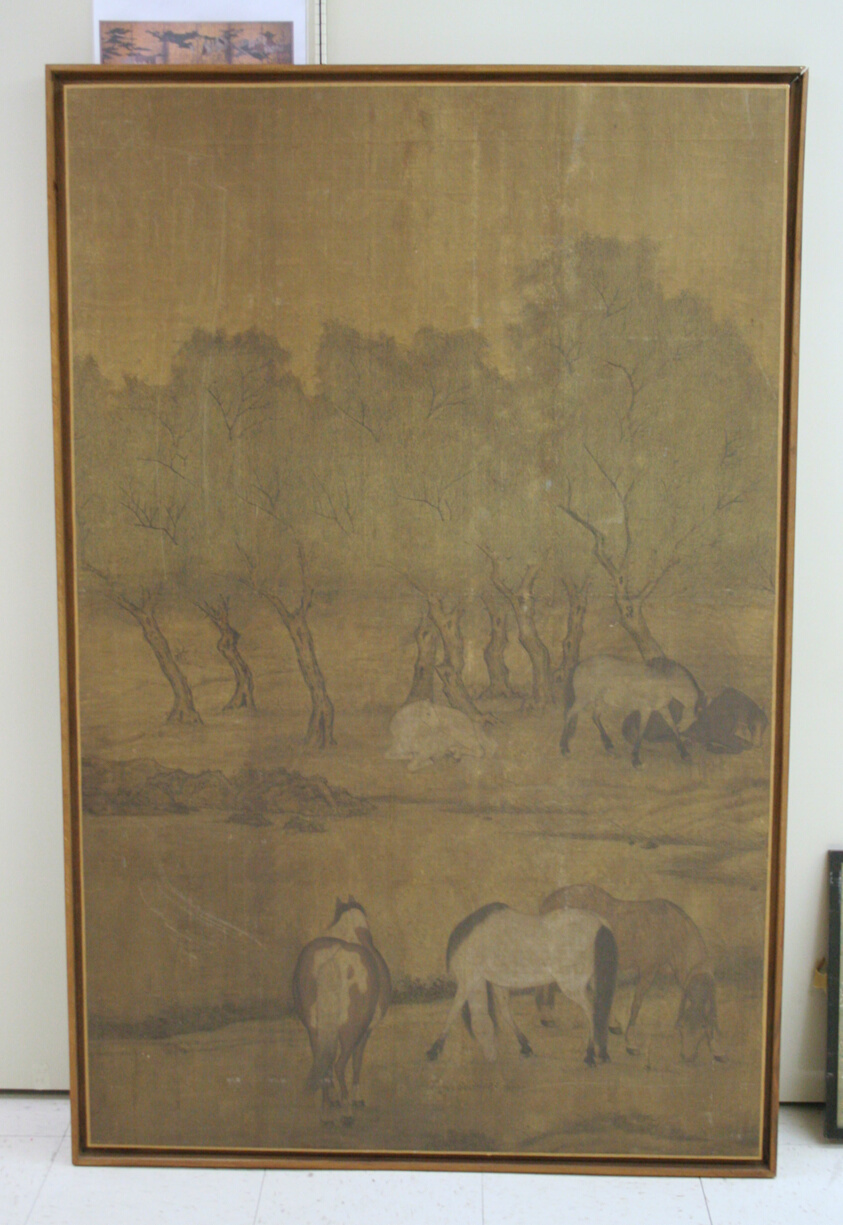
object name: Painting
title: Six Horses Grazing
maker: Artist unknown (Chinese)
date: Ming dynasty (1368–1644)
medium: Ink and light color on silk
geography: China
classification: ink or chalk wash; painting; asian art